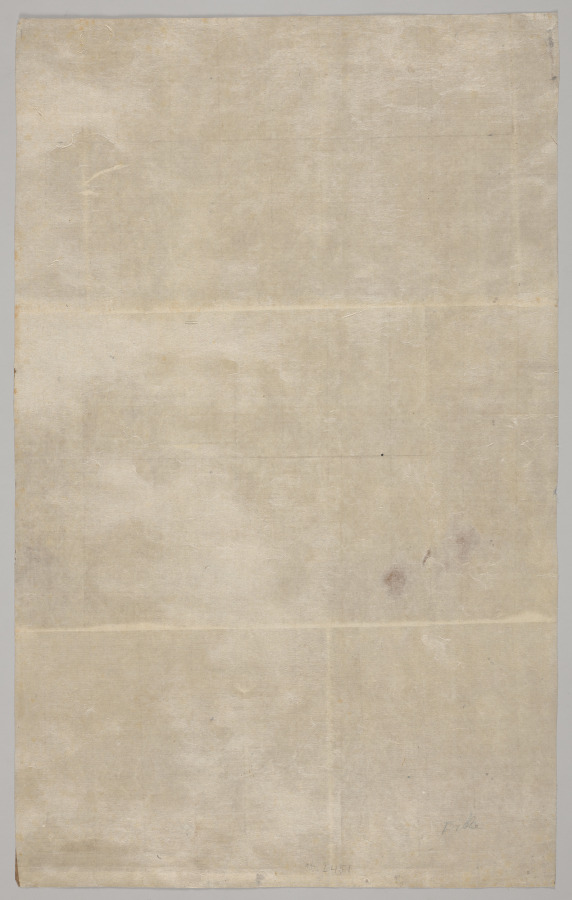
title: Scenic Spots of Jiangtian Temple on Jinshan, Built by Imperial Command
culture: China, Qing dynasty (1644–1911), Kangxi reign (1622–1722)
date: 1662–1722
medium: Polychrome woodblock print; ink and color on paper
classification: Print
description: In the 1600s, printing flourished in such Jiangnan cities as Nanjing, Suzhou, Hangzhou, and Huizhou, evolving from privately enjoyed illustrated books printed in color to more commercialized single-sheet color prints that were hung on walls and became part of the rich urban visual culture.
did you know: Woodblock printing in color reached a height in China in the 1600s to 1700s. The prints were executed by means of sets of separate blocks, each carved to print a different color.